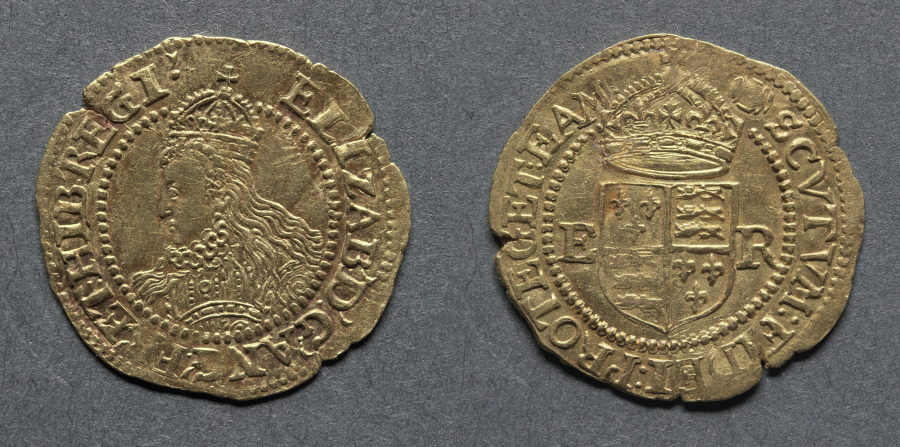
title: Halfcrown: Elizabeth I (obverse); Crowned Shield of Arms (reverse)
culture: England, Elizabeth I, 1558-1603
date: 1592–95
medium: gold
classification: Coins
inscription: ELIZAB; D; G; ANG; FR; ET. HIB; REGI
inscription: SCVTVM. FIDEI. PROTEGET. EAM.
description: This is the second type of gold halfcrown, showing the queen in ornate style. She often wore elaborate and luxuriously decorated dresses, many of them heavily bejeweled as seen here. The mint mark, visible just above the crown on the reverse, is a tun or barrel. This helps identify the date the coin was issued as the mint mark changed every few years.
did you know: First issued in 1549, the halfcrown is the equivalent of two shillings, six pence. It was discontinued in 1970.